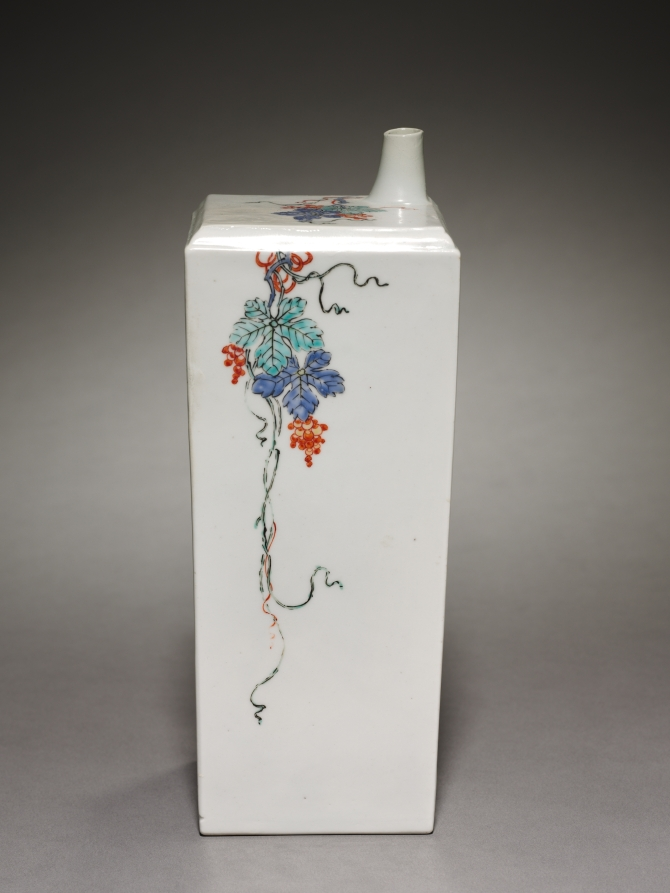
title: Square Bottle with Squirrel and Grapes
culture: Japan, Edo period (1615–1868)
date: late 1600s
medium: porcelain with overglaze color enamel (possibly Hizen ware, Kakiemon type)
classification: Ceramic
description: In the 1600s, Korean and Japanese elites could enjoy wine from Europe. In his 1636 travel diary called Haecharok, Kim Seryeom, a vice director of Korean envoys to Japan, recorded that the head of Japan’s Tsusima Island treated him to Western red wine. Therefore, export porcelain ware like Square Bottle with Squirrel and Grapes could have been made as a wine bottle.